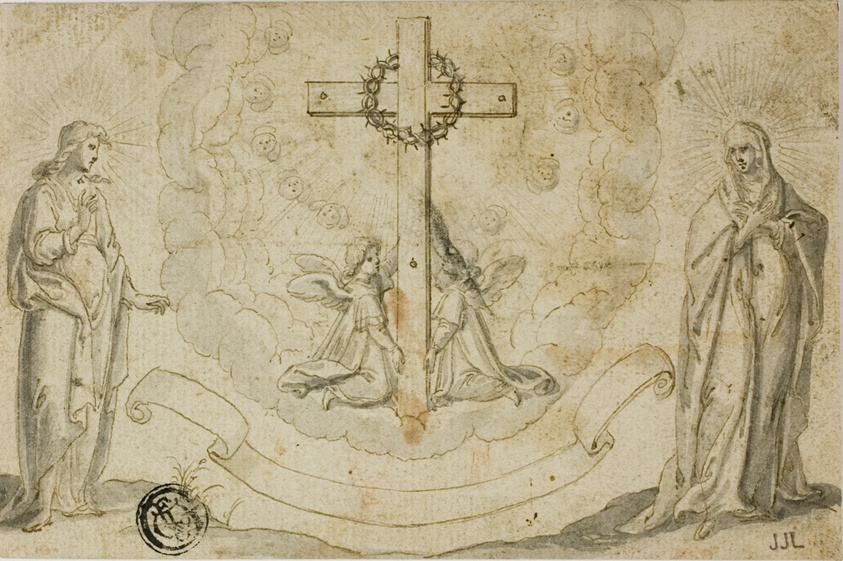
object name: Drawing and Watercolor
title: Virgin Mary and St. John the Evangelist Beholding a Vision of the Cross Held by Two Angels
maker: Christoph Schwarz (Geman, 1545-1592)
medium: Pen and brown ink with brush and gray wash, on cream laid paper, laid down on cream laid paper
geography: Germany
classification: pen and ink drawings; drawings (visual works); prints and drawing